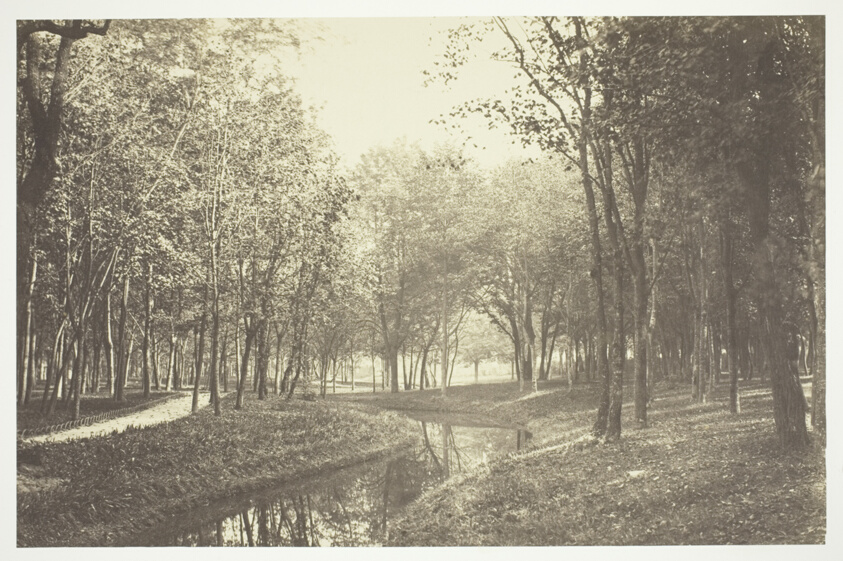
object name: Photograph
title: Untitled, from the series Bois de Boulogne"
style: 19th century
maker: Charles Marville (French, 1813–1879)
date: c. 1850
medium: Albumen print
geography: France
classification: albumen silver print; photographic process; photography; photograph